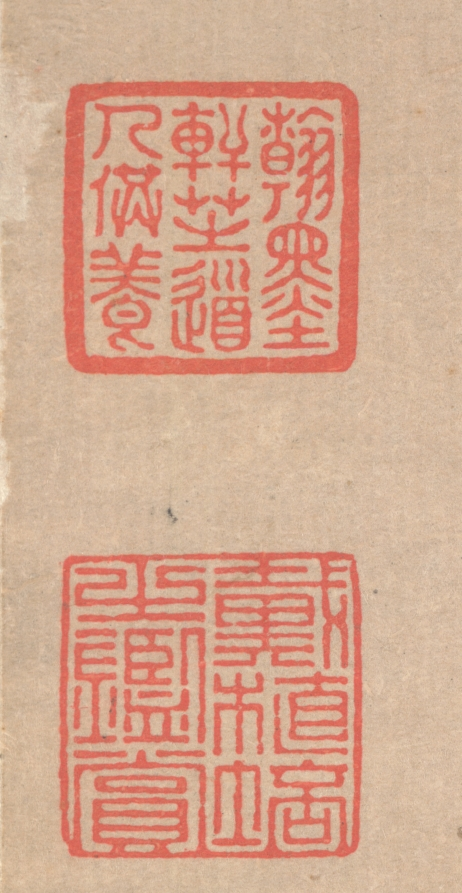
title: Zhong Kui Supported by Ghosts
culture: China, Qing dynasty (1644–1911)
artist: Luo Ping (Chinese, 1733–1799)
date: 1700s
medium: hanging scroll; ink and light color on paper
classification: Painting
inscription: 兩峰道人羅聘畫 【印】 兩峰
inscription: 4 additional seals: 3 of Dai Zhi 戴植 (19th c.); 1 of Ren Bonian 任伯年 [Ren Yi 任頤] (1840–1895)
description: In popular belief, Zhong Kui is a powerful guard against evil spirits, particularly on New Year’s Day and at the Double-Fifth Festival, on the fifth day of the fifth lunar month, when his image is displayed in households to prevent diseases and other misfortunes.